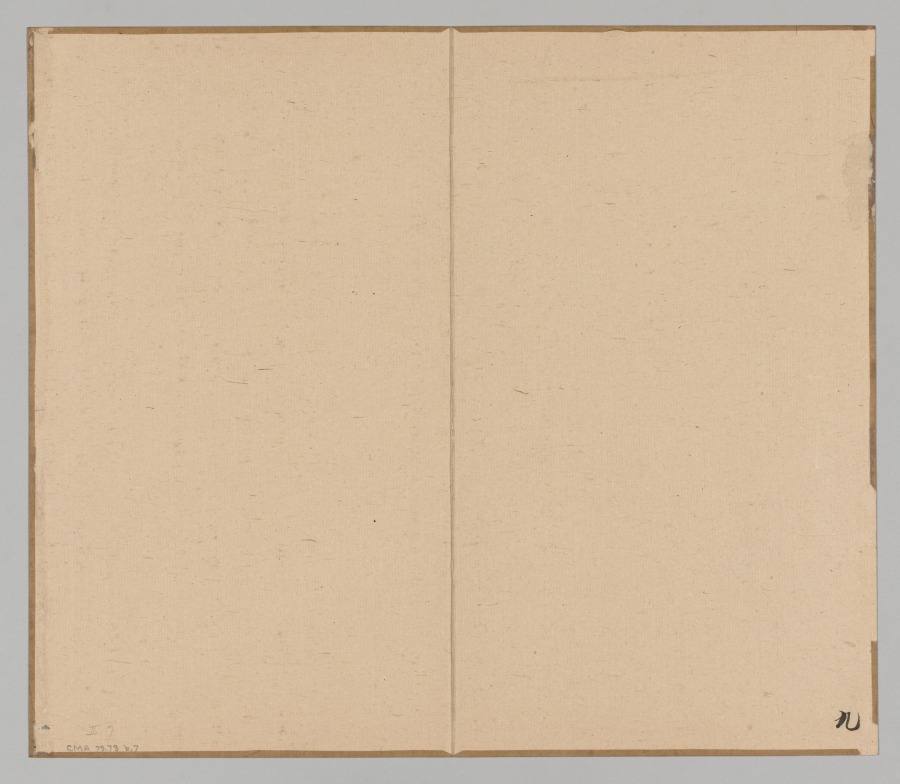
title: Reverberations of Taiga, Volume 2 (leaf 7)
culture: Japan, Edo period (1615–1868)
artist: Aoki Shukuya (Japanese, d. 1802)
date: mid-1700s–1802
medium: double-leaf from a pair of albums; ink and light color on paper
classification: Portfolio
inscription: 高遠/ 吳道子法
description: Aoki Shukuya was a top student of painter Ike Taiga and took responsibility for Taiga’s stylistic legacy. A painting album by Taiga, part of which survives today in Kyoto in hanging scroll format, served as the source for this painting by Shukuya and the matching designs from a set of wood-block–printed volumes published in 1804. The postscript to the books, written and carved by the scholar Minagawa Kien (皆川淇園) (1735–1807), explains that Taiga produced the original album for his wife and fellow painter Tokuyama Gyokuran (徳山玉瀾) (1727/28–1784). The third volume of the wood-block–printed books contains an image of a tall mountain peak with the text “high and distant” (高遠) to its left. Shukuya’s version of this design includes additional words—he wrote that the design represents the method of Wu Daozi (吳道子) (Chinese, about 689–759). Revered as one of the most important Tang-dynasty painters, Wu Daozi’s work is known today only through copies.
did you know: Traditionally, young painters in Japan began their studies with an established master painter. The master's compositions invariably became models that the apprentice copied to learn various ink and brush techniques.